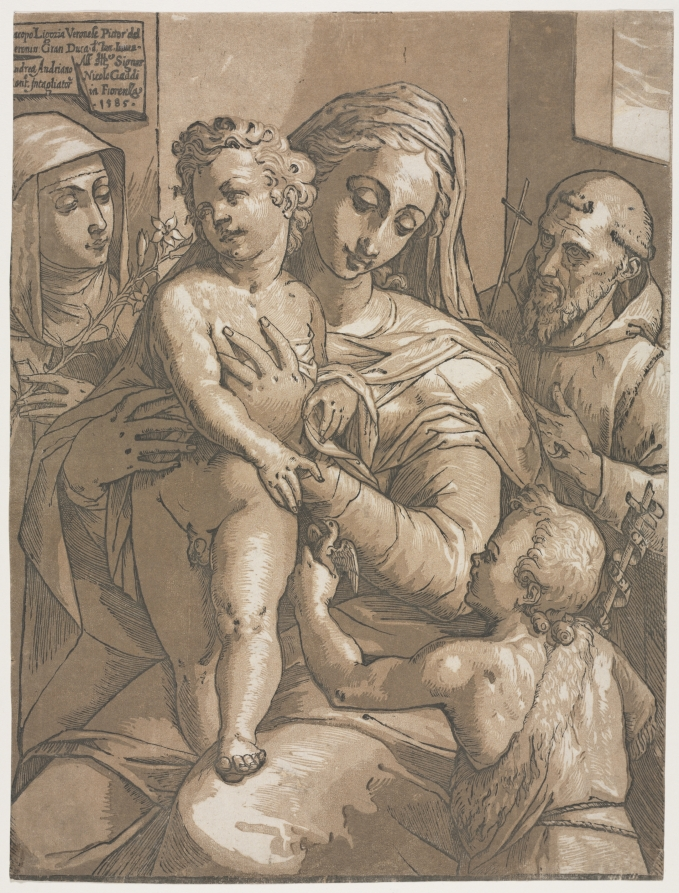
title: Virgin and Child with St. John, St. Catherine of Siena and St. Francis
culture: Italy, 16th century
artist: Andrea Andreani (Italian, about 1558–1610)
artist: after Jacopo Ligozzi (Italian, 1547–1626)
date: 1585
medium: chiaroscuro woodcut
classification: Print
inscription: Lettered upper left: (J)acopo Ligozio Veronese Pittor'del / (Se)reniss Gran Duca di Tosc Inven / (A)ndrea Andriano / (M)ant.o.Intagliator.e /All Ill.o Signor / Nicolo Gaddi / in Fiorenza / °1585°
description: Printed from four blocks in brown, this chiaroscuro woodcut shows the Virgin and Child flanked by the infant Saint John the Baptist and Saint Francis at right. Saint Catherine of Siena takes place on the left, and holds a flower.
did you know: The CMA owns another version of this chiaroscuro woodcut, which differs in the color of the ink used to print it (1949.81).